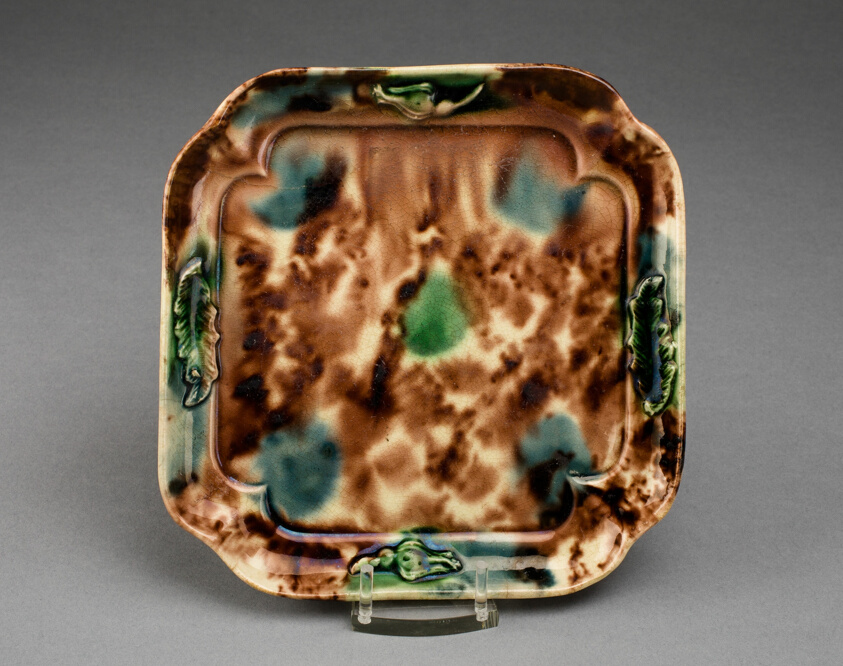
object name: Ceramics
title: Stand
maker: Staffordshire, England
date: 1760/70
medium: Lead-glazed earthenware (creamware)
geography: Staffordshire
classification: earthenware; ceramics; creamware; lead-glazed earthenware; european decorative arts